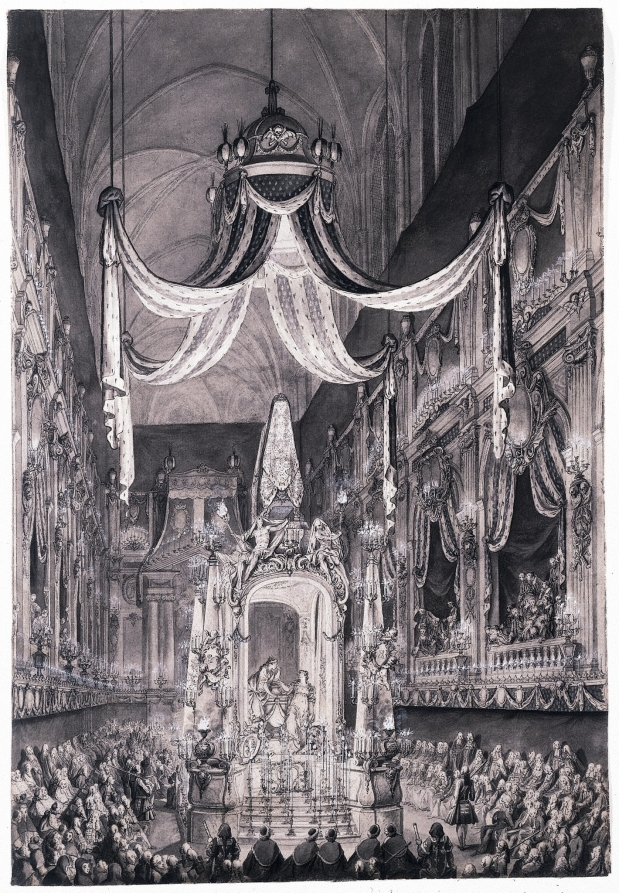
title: Funeral for Marie-Thérèse of Spain, Dauphine of France, in the Church of Nôtre Dame, Paris, on November 24, 1746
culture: France, 18th century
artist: Charles-Nicolas Cochin (French, 1715–1790)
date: c. 1746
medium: Pen and black ink and gray wash heightened with white gouache on cream laid paper, incised (with graphite) for transfer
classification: Drawing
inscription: on scrap of old mount, now removed, in eighteenth-century hand, in brown ink: C. N. Coc[hin] [abraded] filius delineavit. Novemb. 1746.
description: As an official draftsman to the king, Charles-Nicolas Cochin was responsible for documenting royal events, festivities, and ceremonies. When the Spanish princess Marie-Thérèse, wife of Louis XV’s eldest son, died in childbirth, she was given two lavish funerals: one at the Church of Saint Denis, and another, represented in this drawing, at Notre Dame in Paris. Cochin’s drawing shows how the interior of the gothic cathedral was theatrically redecorated in the current rococo style. Beneath the majestic canopy in the center of the nave, an ornate arched structure, a baldequin, contains the princess’s coffin.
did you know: Charles-Nicolas Cochin worked closely with the branch of the royal household charged with organizing and presenting royal ceremonies to produce prints such as the one related to this drawing.